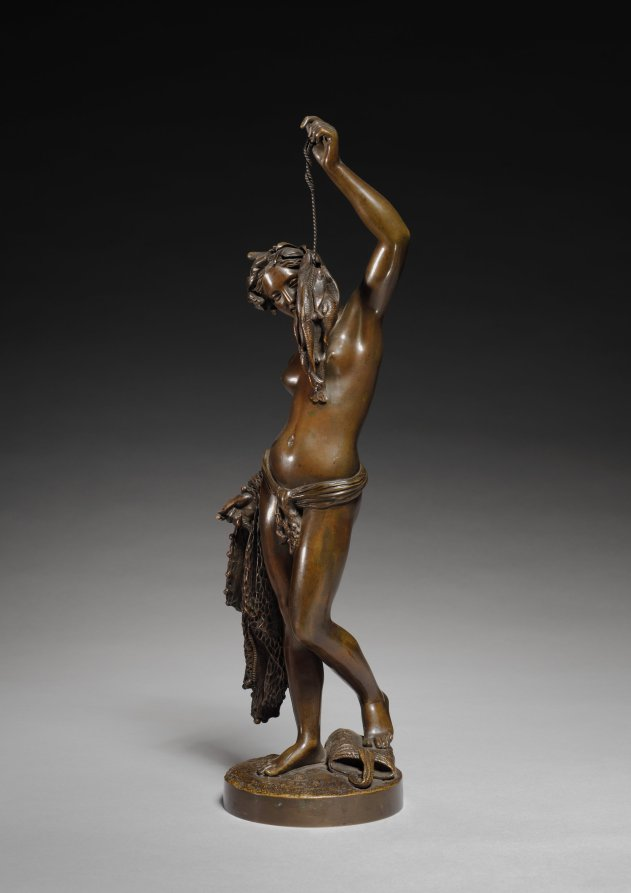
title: Allegory of Fishing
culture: France, 19th century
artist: James Pradier (Swiss, 1790–1852)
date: c. 1840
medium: bronze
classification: Sculpture